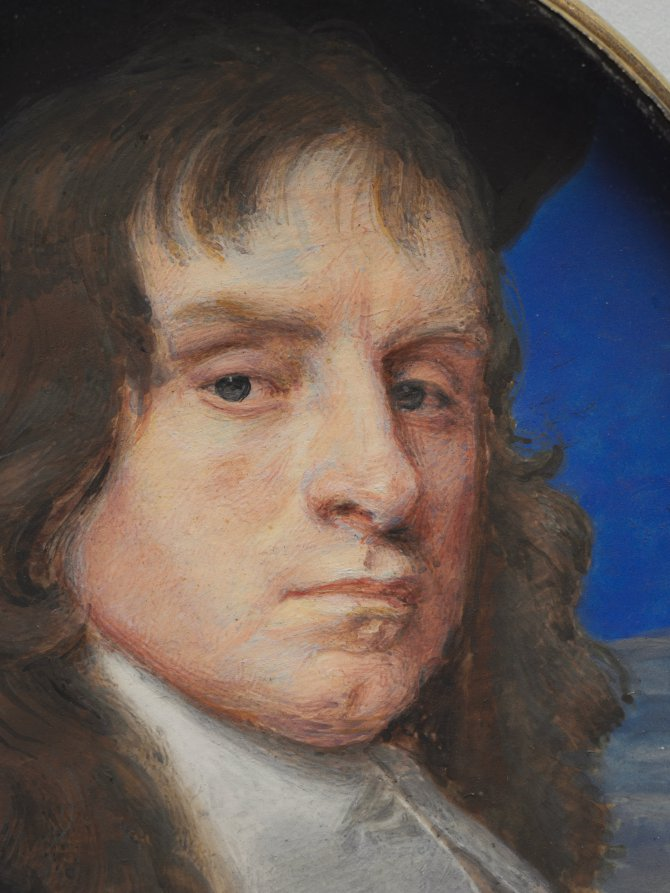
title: Portrait of a Man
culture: England, 17th century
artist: Samuel Cooper (British, 1608/09–1672)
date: c. 1655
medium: watercolor on vellum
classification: Portrait Miniature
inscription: signed left: SC [monogram]